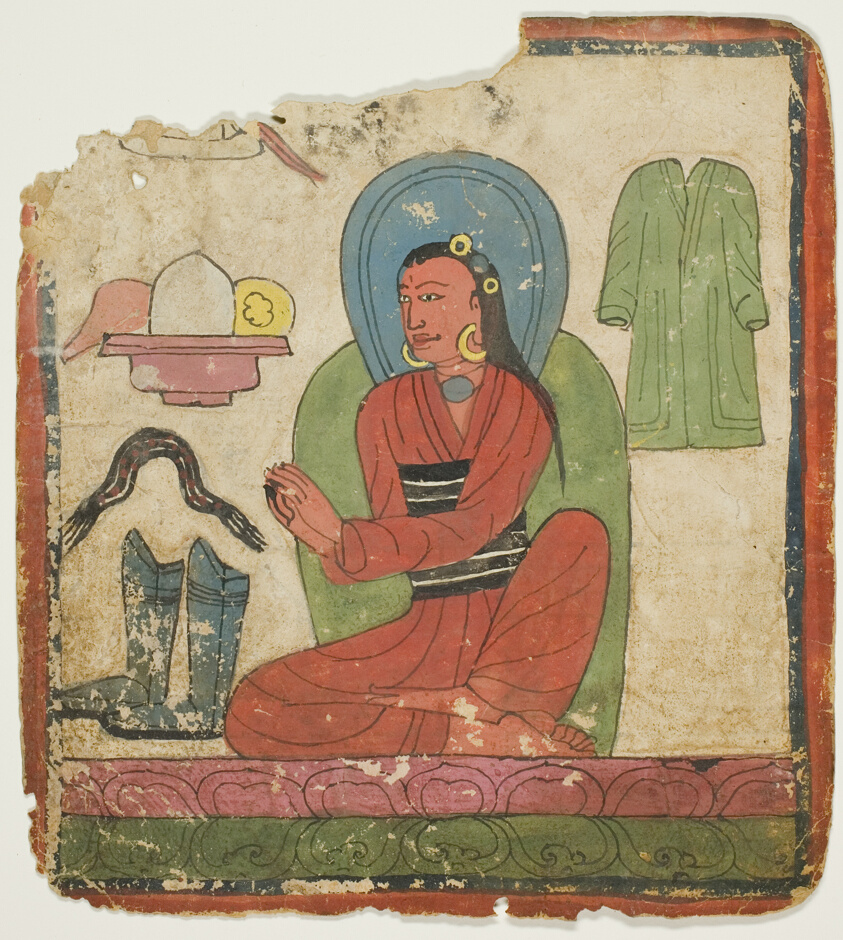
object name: Religious/Ritual Object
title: Image from a Set of Initiation Cards (Tsakali)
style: Himalayan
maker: Southern Tibet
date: 14th/15th century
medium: Ink and watercolor on paper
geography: Tibet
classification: ink; ritual objects